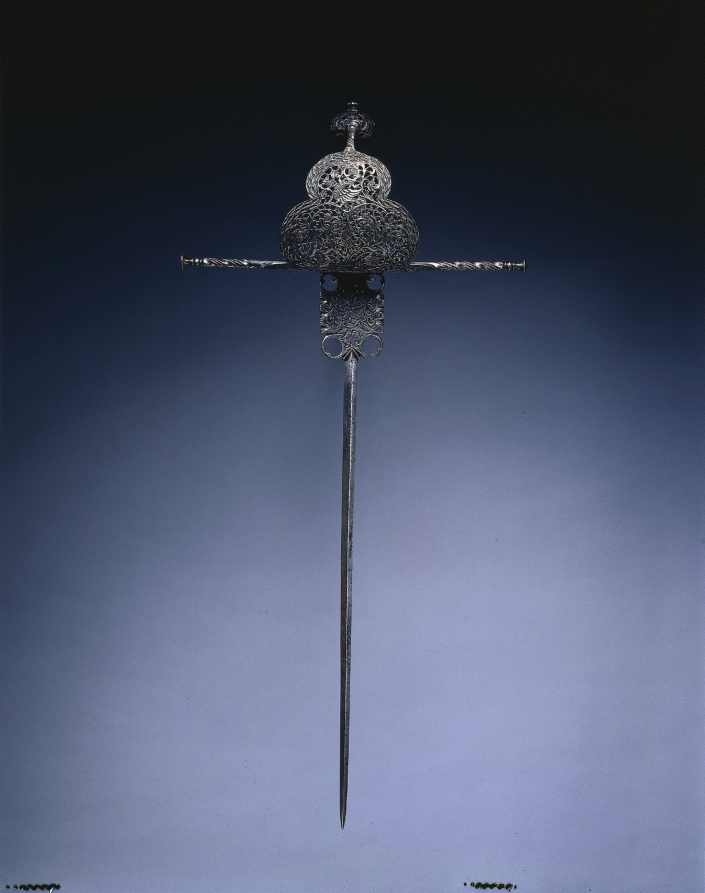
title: Left-Handed Dagger or "Main Gauche"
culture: Spain or Italy, Naples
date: c. 1650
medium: steel, pierced and chiseled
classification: Arms and Armor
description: For parrying, rapiers were often made with accompanying daggers as a matched set, although the rapier shown here (1916.1810) does not originally belong to this dagger. Daggers such as this one have been misleadingly called "left-handed daggers" even though they could be held in either hand. The guard is richly decorated with chiseled and pierced arabesques, an ornamental design consisting of intertwined flowing lines.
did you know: The main-gauche (French for "left hand") was used mainly to assist in defense by parrying enemy thrusts, while the dominant hand wielded a rapier.